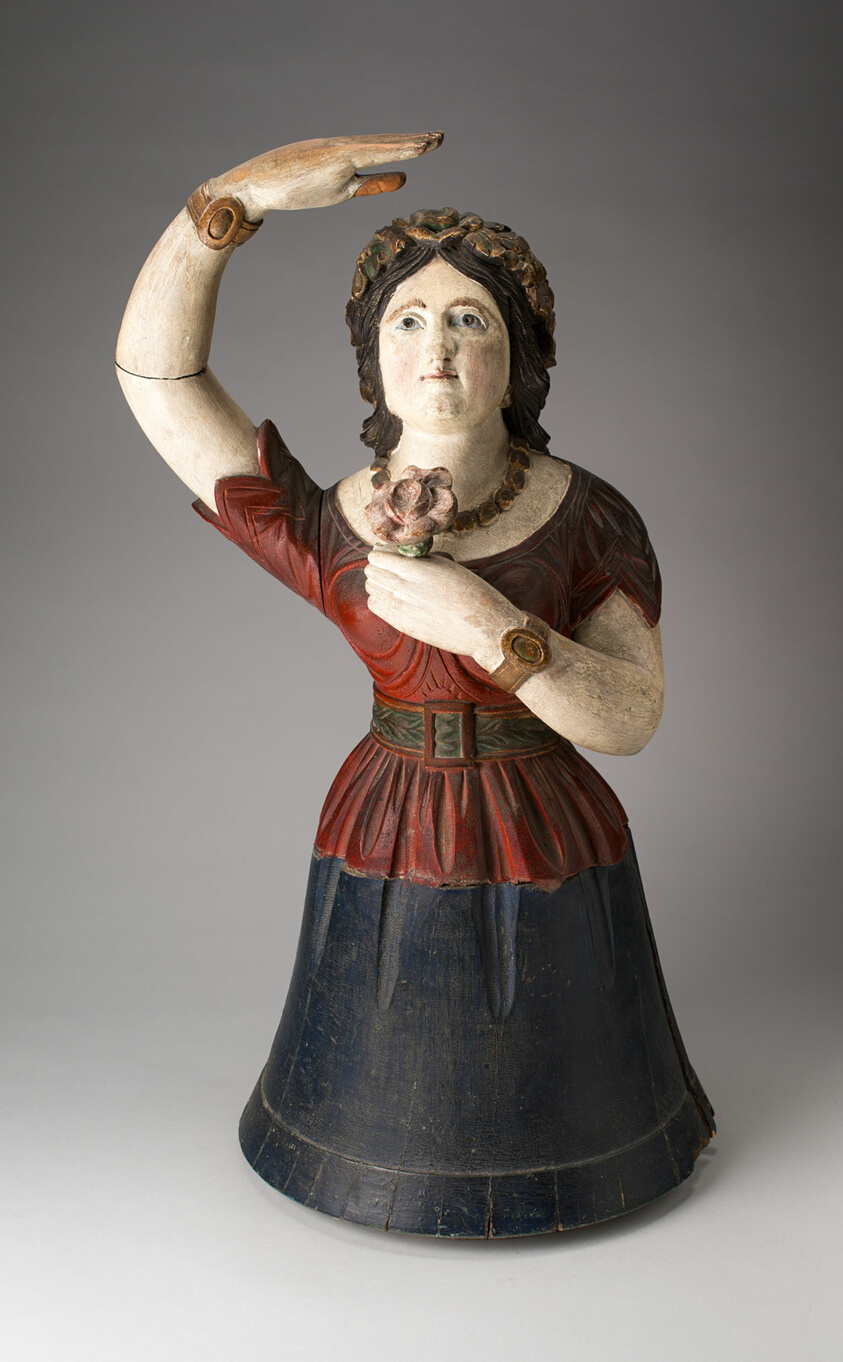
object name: Sculpture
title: Female Figure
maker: Artist unknown (American, 19th century)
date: 1830–60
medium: White pine and paint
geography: United States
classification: sculpture; american arts